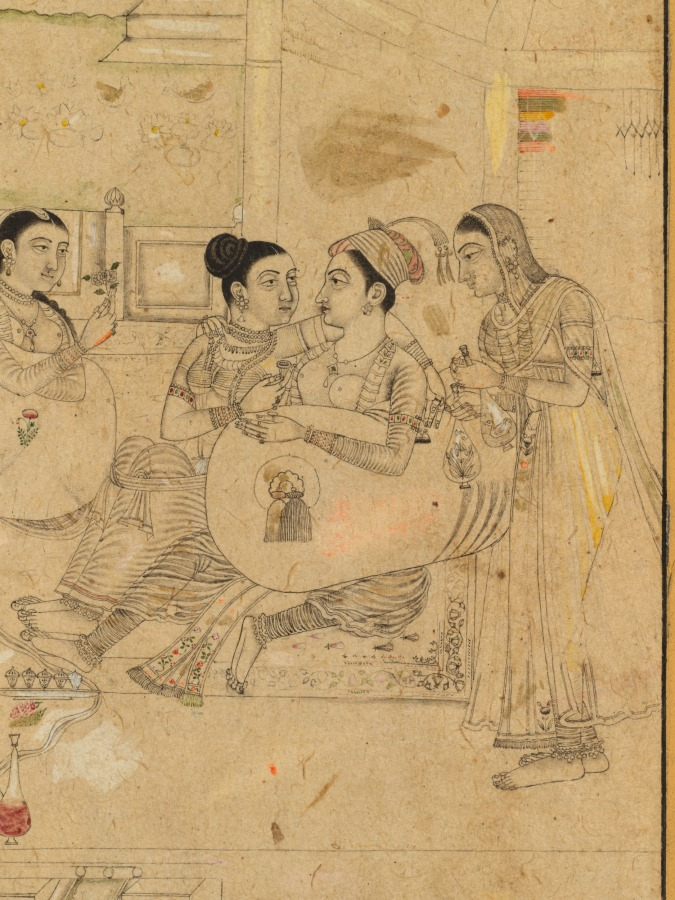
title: Women playing at cross-dressing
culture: India, Golconda, Deccan, 17th century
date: c. 1680–1700; border added 1800s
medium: ink heightened with colors on paper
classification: Painting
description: In this scene harem women act out the visit of a prince. One of them has donned a man’s royal feathered turban, and a lady affectionately offers a cup of wine as attendants stand by with two more bottles, a fan, and a rose. The master artist of an Indian painting workshop would draw the composition and make visual notations as to which colors and patterns should be used. The drawing would then be given to a colorist to paint, with final details rendered by another artist or the initial master.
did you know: Heavy eyelids give a languorous quality to paintings made in Golconda.